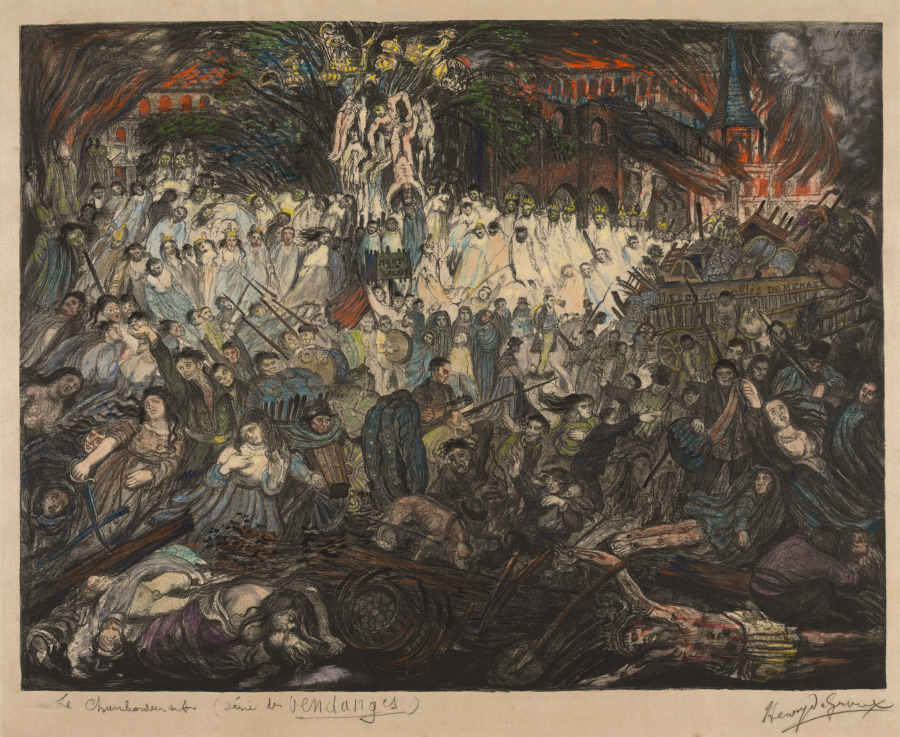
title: Harvests: The Pillage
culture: Belgium, 19th century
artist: Henri de Groux (Belgian, 1867–1930)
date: c. 1894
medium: lithograph with pastel and black chalk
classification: Print